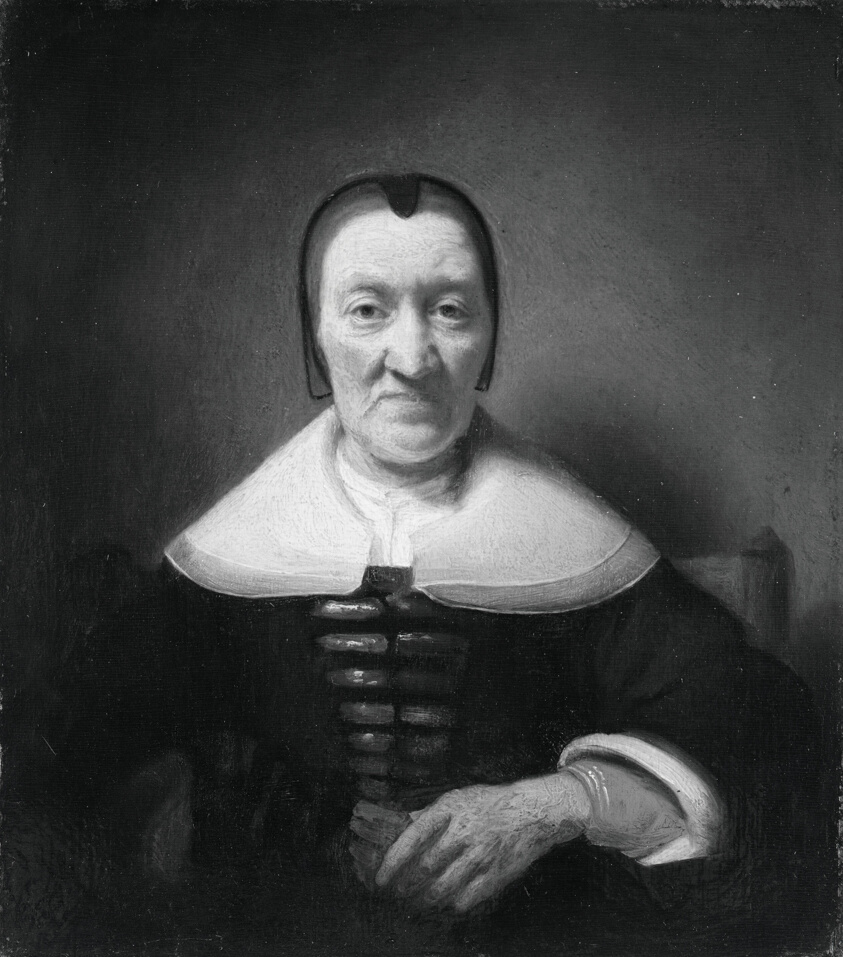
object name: Painting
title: Portrait of a Woman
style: 17th Century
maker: Attributed to Nicolaes Maes (Dutch, 1634–1693)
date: c. 1655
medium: Oil on panel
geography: Holland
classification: oil on panel; portrait; dutch; paint; oil paintings (visual works); painting; european painting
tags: portraits: female subject, dresses, elderly, headdresses, portrait, portraits, woman, Century of Progress, world's fairs, Chicago World's Fairs